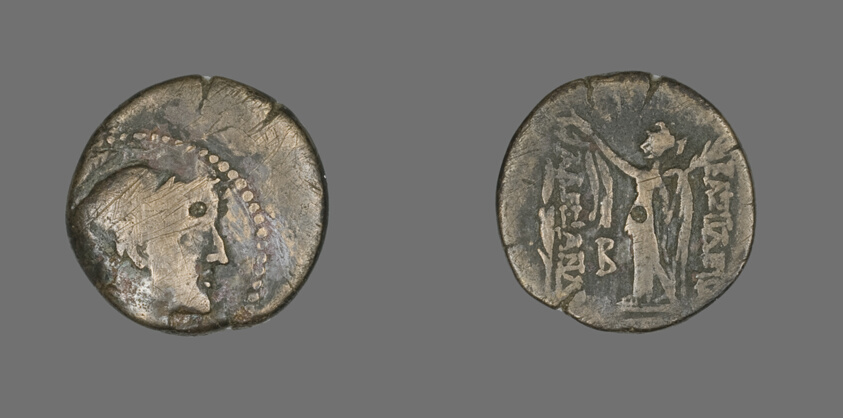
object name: Coin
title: Coin Depicting the Goddess Athena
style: greek, ancient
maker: Greek; Macedonia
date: 336-323 BCE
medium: Bronze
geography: Ancient Greece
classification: coin; ancient art